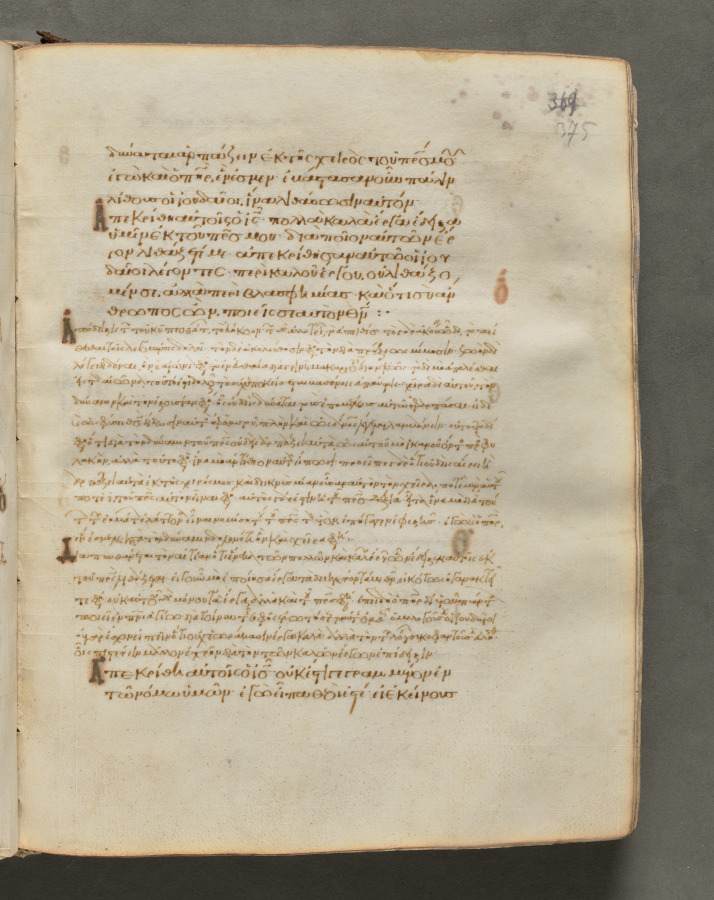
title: Text, folio 375 (recto), from a Gospel Book with Commentaries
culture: Byzantium, Constantinople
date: c. 1000–1100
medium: ink, tempera, and gold on vellum; leather binding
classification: Bound Volume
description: Each of the four gospels in this book opens on a page with brilliantly illuminated borders depicting the author of the text as well as birds—principally peacocks, symbols of the immortality of the soul—and fountains, representing the fountain of life and the salvation of the soul. This volume consists of 428 leaves with texts in Greek. Its level of sophistication suggests that it was probably written and decorated in a monastery in Constantinople.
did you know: Gospel books were carried in procession through Byzantine churches.